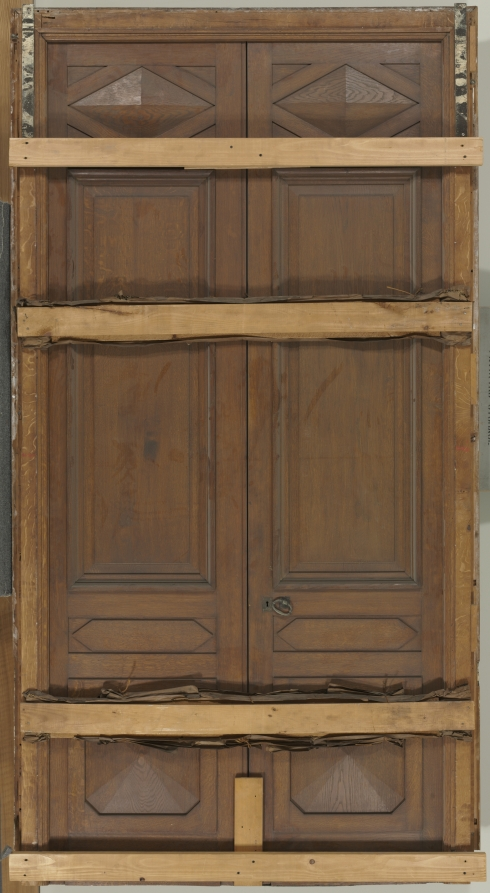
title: Overdoor Painting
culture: France, 18th century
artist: Pierre Rousseau (French, 1751–1829)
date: 1790s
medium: oil on canvas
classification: Painting